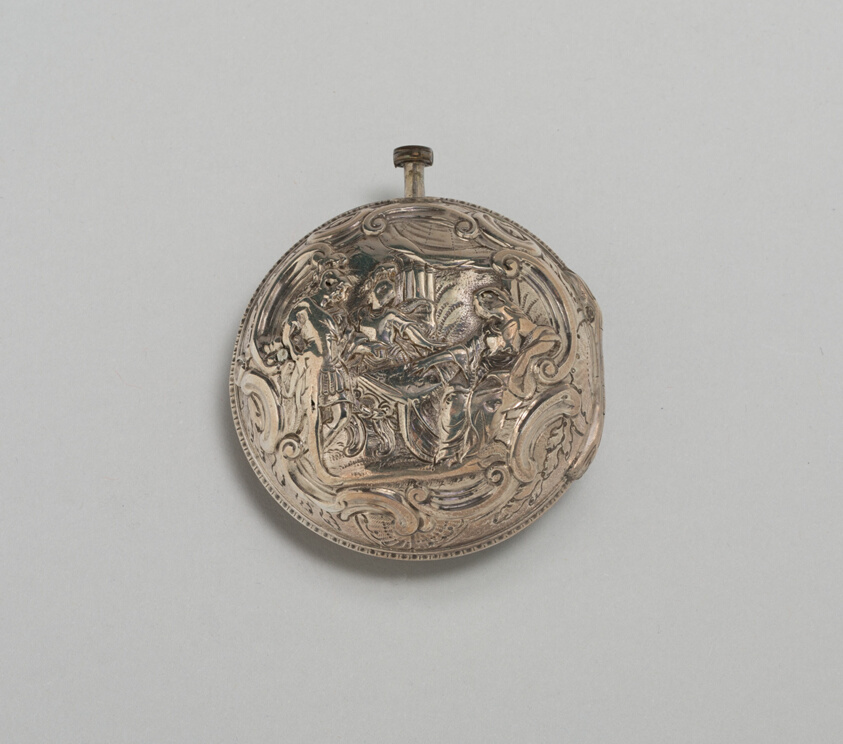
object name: Metalwork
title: Watch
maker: James Shearwood; English, 18th century; London, England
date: Mid 18th century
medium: Silver and enamel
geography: London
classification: watch; european decorative arts; metalwork